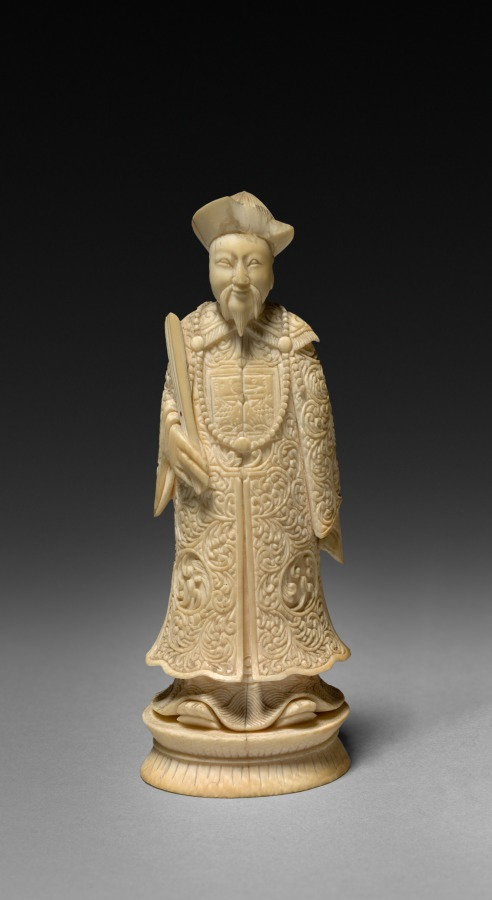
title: Chess Piece: King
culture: Japan, Meiji period (1868–1912)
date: early 1900s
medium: ivory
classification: Ivory